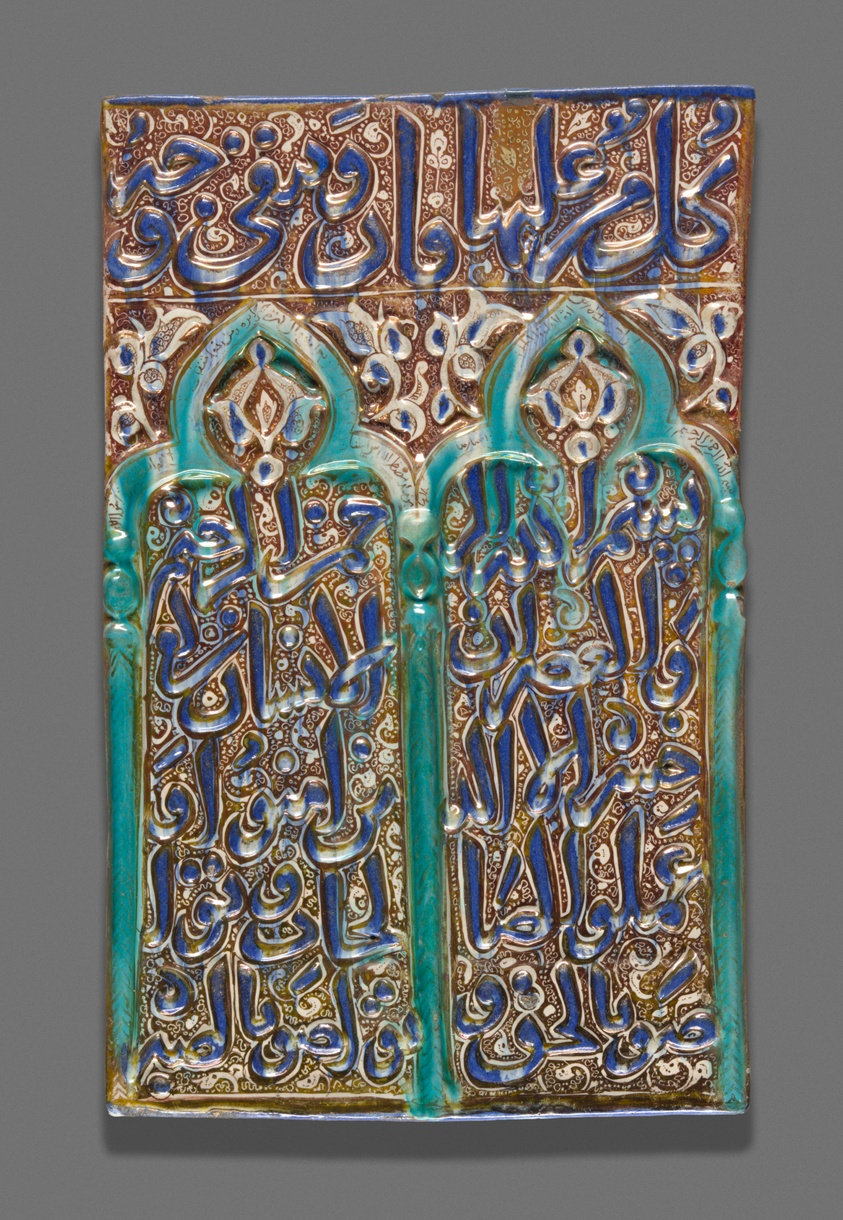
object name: Architectural fragment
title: Tile with a Double-Arched Prayer Niche (Mihrab)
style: Islamic (culture or style)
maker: Iran; Probably Kashan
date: Ilkhanid dynasty (1256–1353), 13th century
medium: Lusterware, fritware with molded decoration and in-glaze painting in cobalt blue and turquoise, and overglaze painting in luster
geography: Iran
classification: earthenware; asian art; ceramics; decorative arts